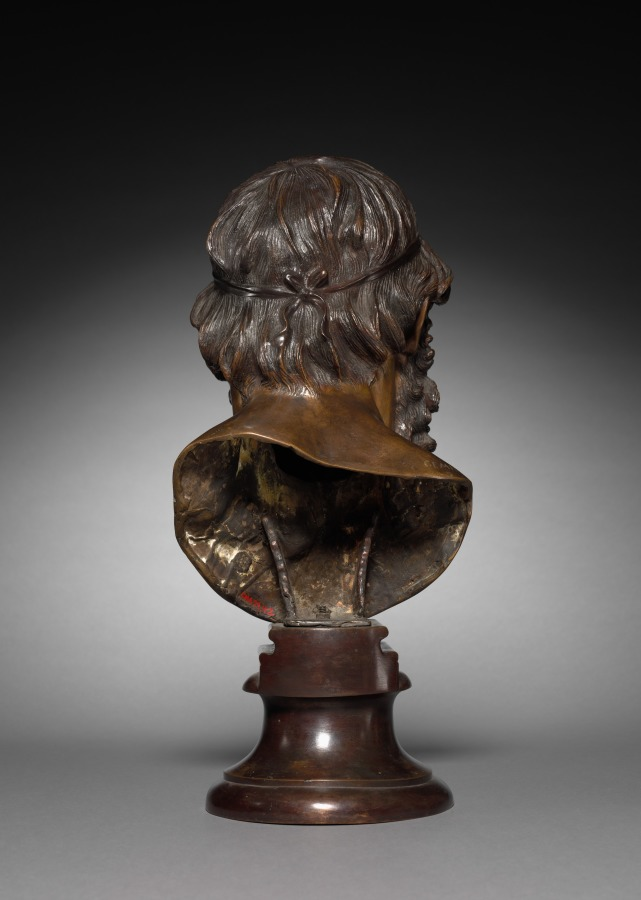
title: Head of a Philosopher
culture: Italy, 19th century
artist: Vincenzo Gemito (Italian, 1852–1929)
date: 1883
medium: bronze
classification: Sculpture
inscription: Signed: "Gemito"; stamped: "FONDERIA GEMITO NAPOLI"